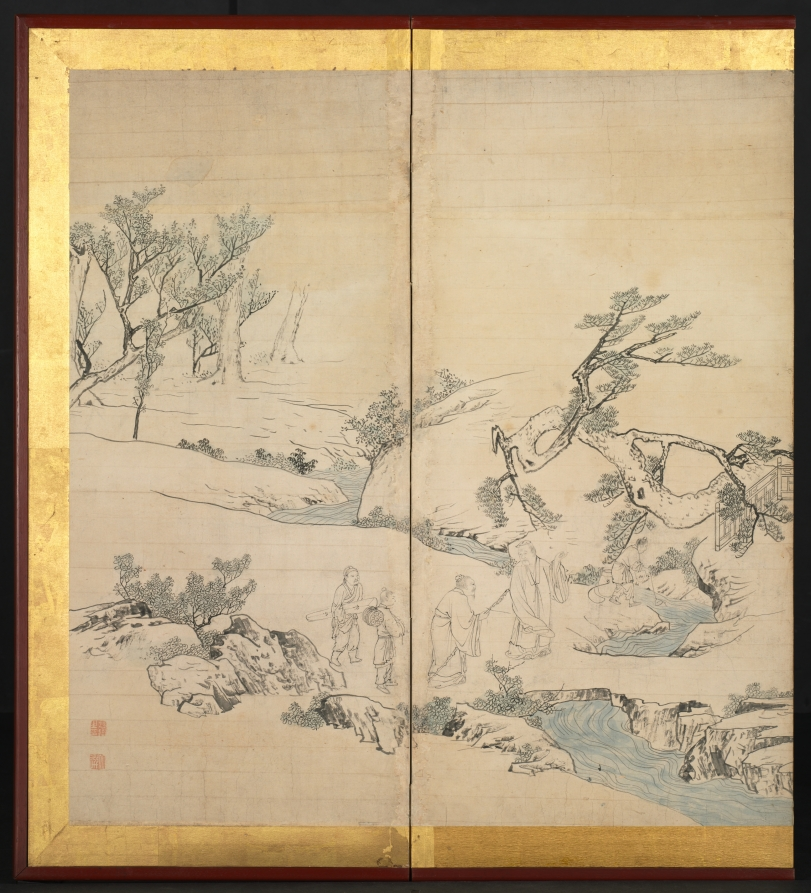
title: Literary Gathering in the Orchid Pavilion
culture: Japan, Edo period (1615–1868)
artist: Maruyama Ōkyo (Japanese, 1733–1795)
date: late 1700s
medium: Six-panel folding screen; ink and slight color on paper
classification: Painting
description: A cheerful gathering of poets was one the most popular themes of East Asian literati paintings. Literary Gathering in the Orchid Pavilion depicts a poets’ party hosted in AD 353 by the famous Chinese calligrapher Wang Xizhi to celebrate the Spring Purification Festival, observed annually on the third day of the third month. Wang invited 41 scholar-poets to compose poetry and drink while seated along the bank of a winding rivulet. This screen would have appeared on the left and shows preparations for the gathering. The lost right screen is assumed to have depicted the poets sitting along the stream.